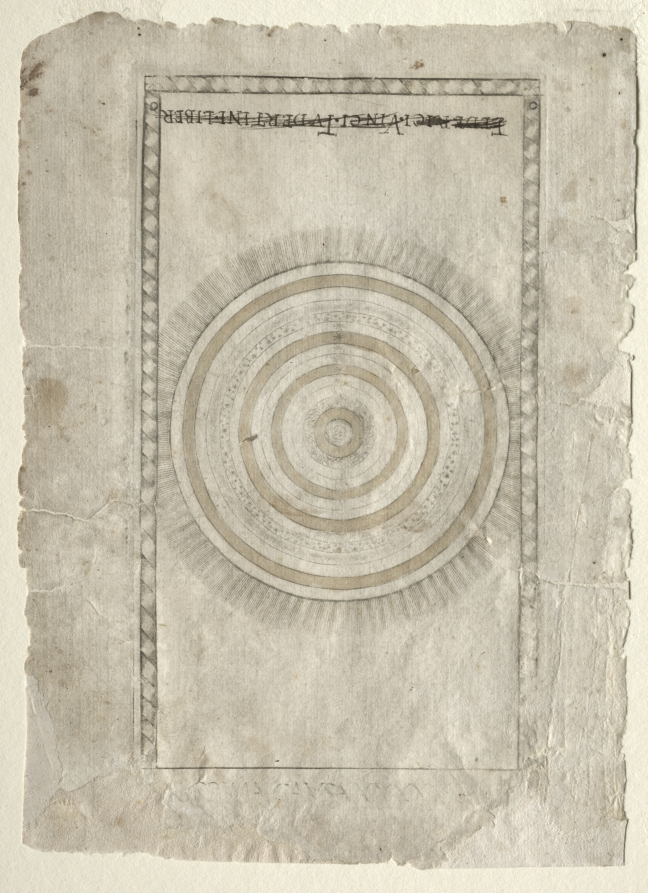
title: The Empyrean Sphere (from the Tarocchi, series A: Firmaments of the Universe, #50)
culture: Italy, Ferrara, 15th century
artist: Master of the E-Series Tarocchi (Italian, active 1460s)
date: before 1467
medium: engraving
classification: Print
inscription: Inscription scratched out at the top of the print. Lettered below the image of Prima Causa (First Cause): [A] / [PRIMA CAUSA XXXXX] / [50]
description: This engraving is part of the Tarocchi group marked with the letter “A”, and named Firmaments of the Universe. This series comprises the seven planets from the classical astronomy (Moon, Mercury, Venus, Sun, Mars, Jupiter, Saturn) and the three celestial spheres that separate them from the Supreme Entity (Prima Causa) from which everything was originated. Here, Prima Causa (First Cause) personified God himself. It is shown as concentric circles representing the surface of the imaginary sphere on which celestial bodies appear to be projected. This is a diagram of the universe. It displays earth at the center and make up of four circles standing for the four elements (earth, water, air, and fire). Beyond earth are the seven circles symbolizing each planet. It follows the primum mobile and finally the three radiant circles of the Trinity.